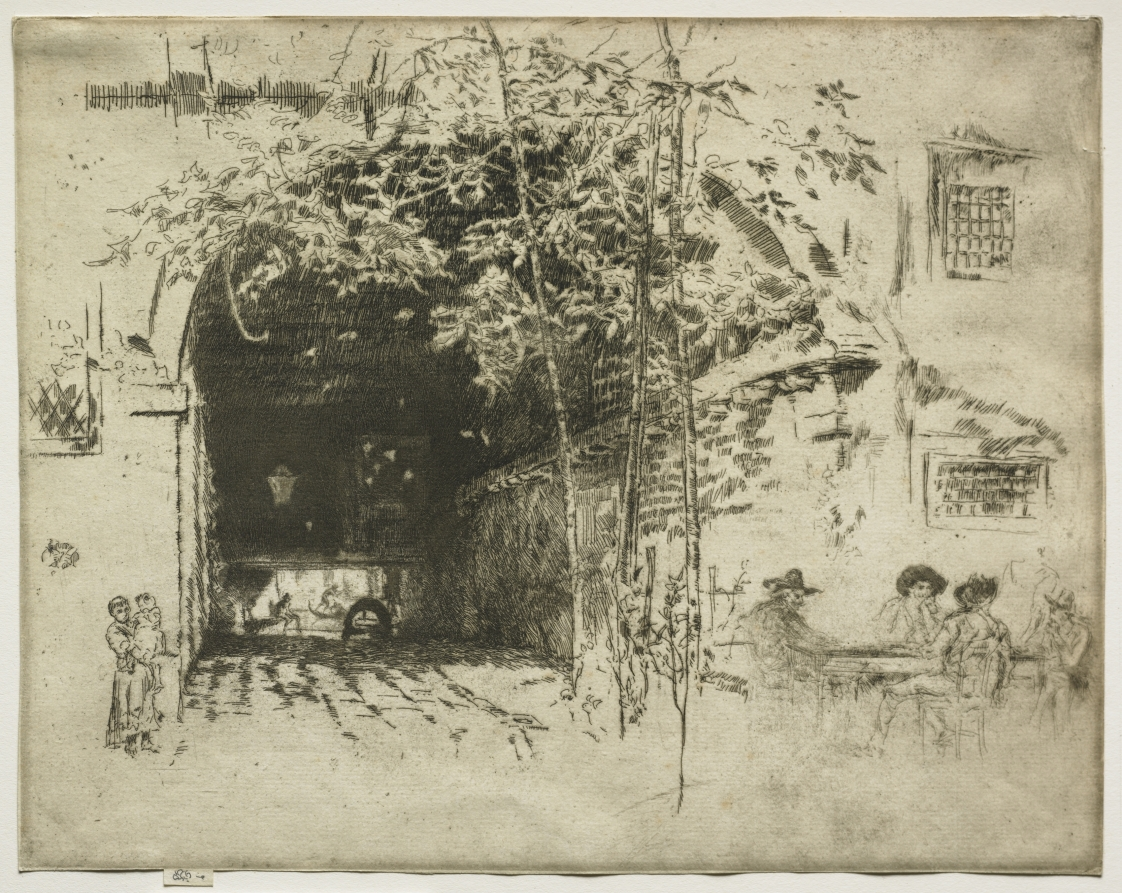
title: The Traghetto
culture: America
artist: James McNeill Whistler (American, 1834–1903)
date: 1880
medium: etching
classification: Print